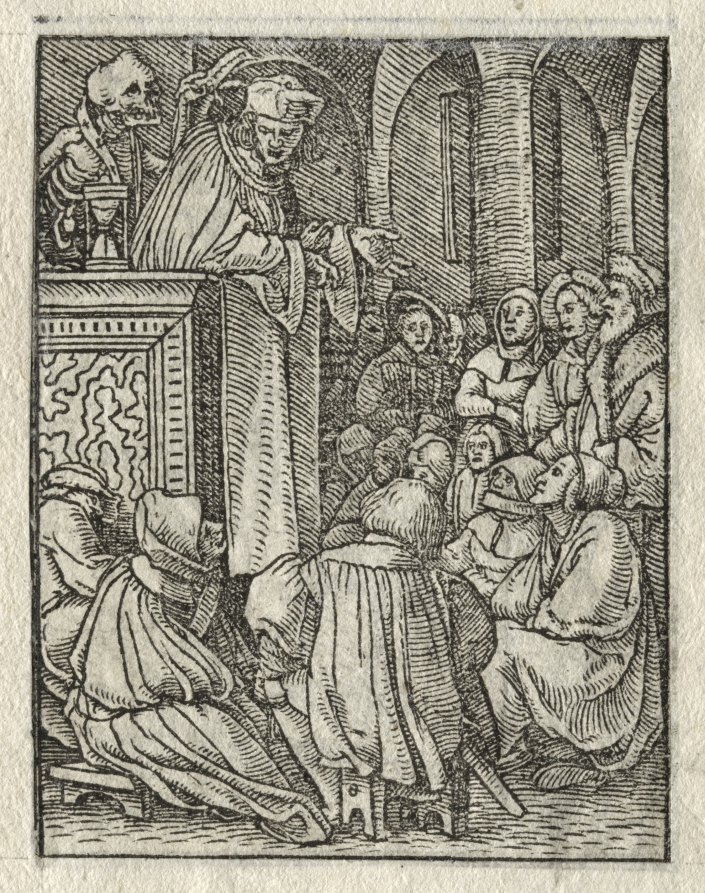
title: The Dance of Death: The Preacher; The Priest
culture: Germany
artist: Hans Holbein the Younger (German, active England and Switzerland, 1497/98–1543)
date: c. 1526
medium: woodcut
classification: Print